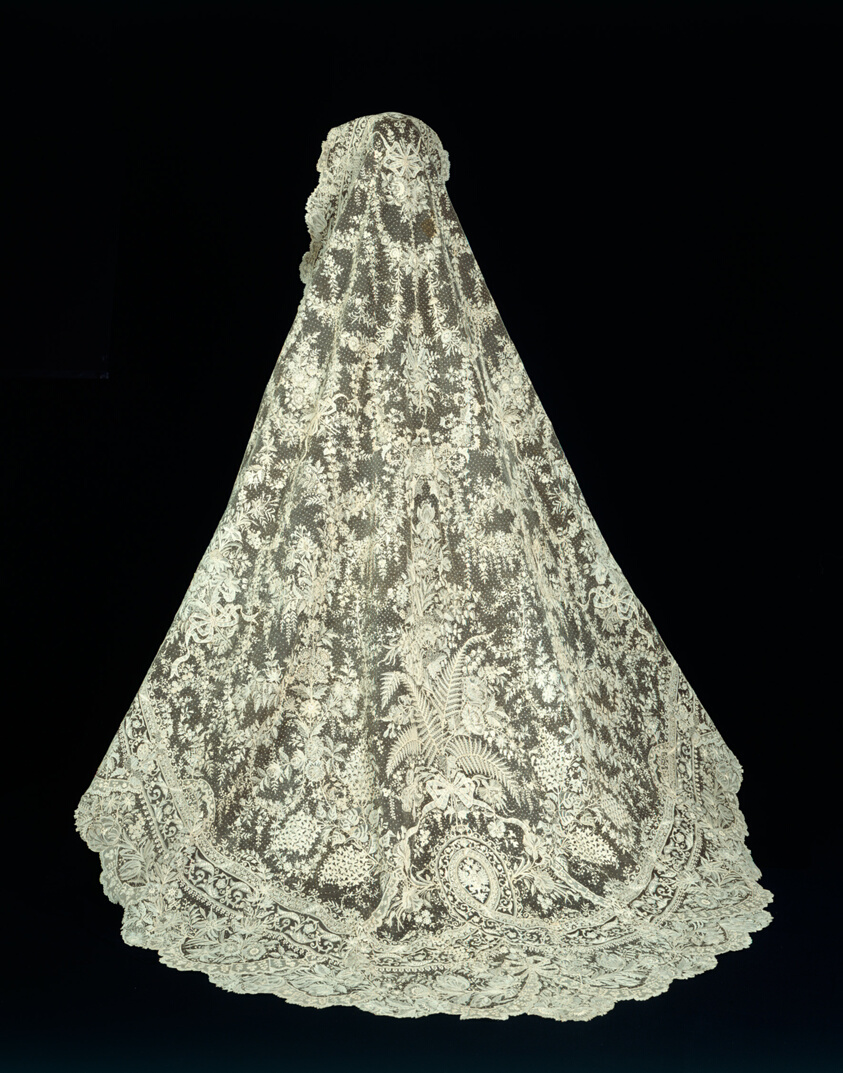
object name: Costume and Accessories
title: Veil with Russian Imperial Family Coat of Arms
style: russian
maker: Belgium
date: 1875/1900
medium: Cotton, needle lace of a type known as "Point de Gaze"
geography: Belgium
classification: costume - lace; lace - needle; lace; textile; costume; costume accessory; costume accessory worn above the waist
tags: women, coat of arms, flowers, imperial families, fashion